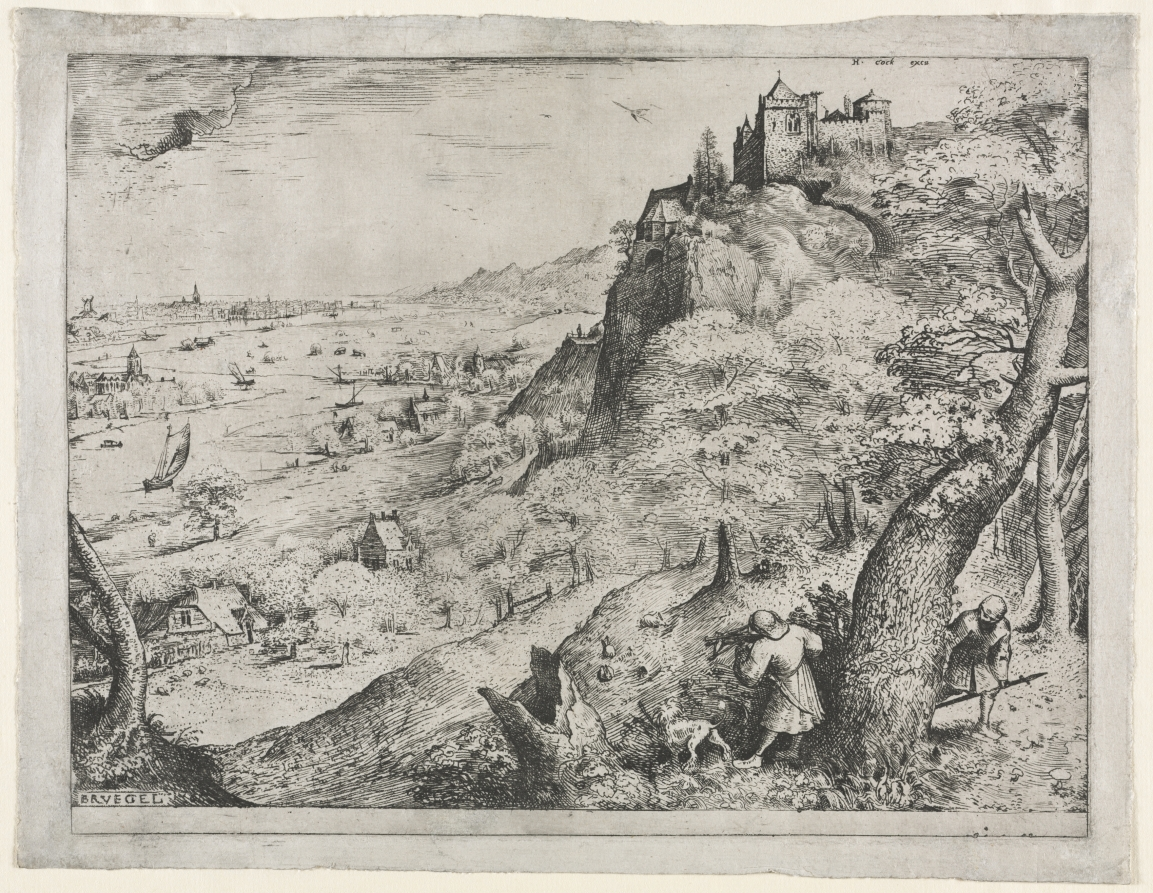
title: The Rabbit Hunt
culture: Flanders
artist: Pieter Bruegel (Netherlandish, c. 1525/30–1569)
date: 1560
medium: etching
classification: Print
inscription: Inscribed in the plate, BRUEGEL, lower left and upper right H Cock excu.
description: In this etching considered the artist's only autograph print, Pieter Bruegel the Elder replicated the graphic vocabulary of dots and dashes of his pen-and-ink drawings to evoke a vivid sense of atmosphere and light and create a deep recession into space. His representations of nature, including majestic mountains—an unusual and popular subject in the flat Netherlands—exemplify an unprecedented naturalism that the artist helped to usher in. What at first appears to be a pleasant landscape with a hunter aiming his crossbow at some rabbits in the grass becomes more ominous when we notice the spear-bearing soldier stalking not the rabbits, but the hunter. Bruegel often translated popular proverbs into pictorial form: in this case, "A hare yourself, you hunt for prey" is the most apt. In Bruegel's world, reversals such as this suggested that humans, vainly believing they control their fate, are instead subject to powers outside of their control.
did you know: Pieter Bruegel the Elder's paintings, drawings, and prints often drew from popular proverbs, translating them into pictorial form. In the case of this etching, "A hare yourself, you hunt for prey" is perhaps the most apt.